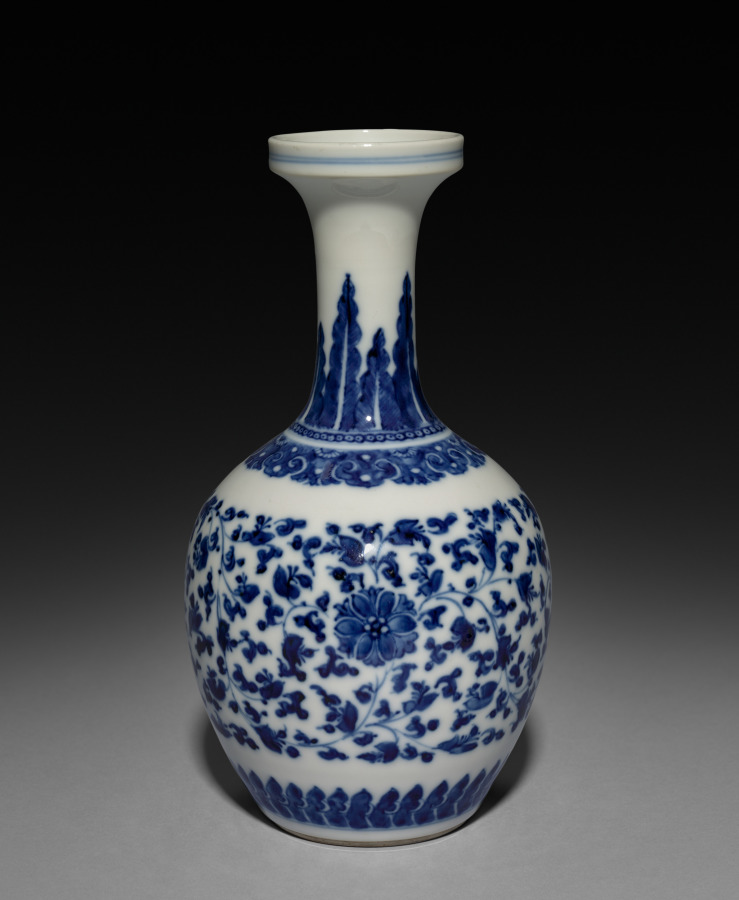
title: Globular Vase with Long Neck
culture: China, Qing dynasty (1644-1911), Kangxi reign (1661-1722)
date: 1661–1722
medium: porcelain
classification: Ceramic